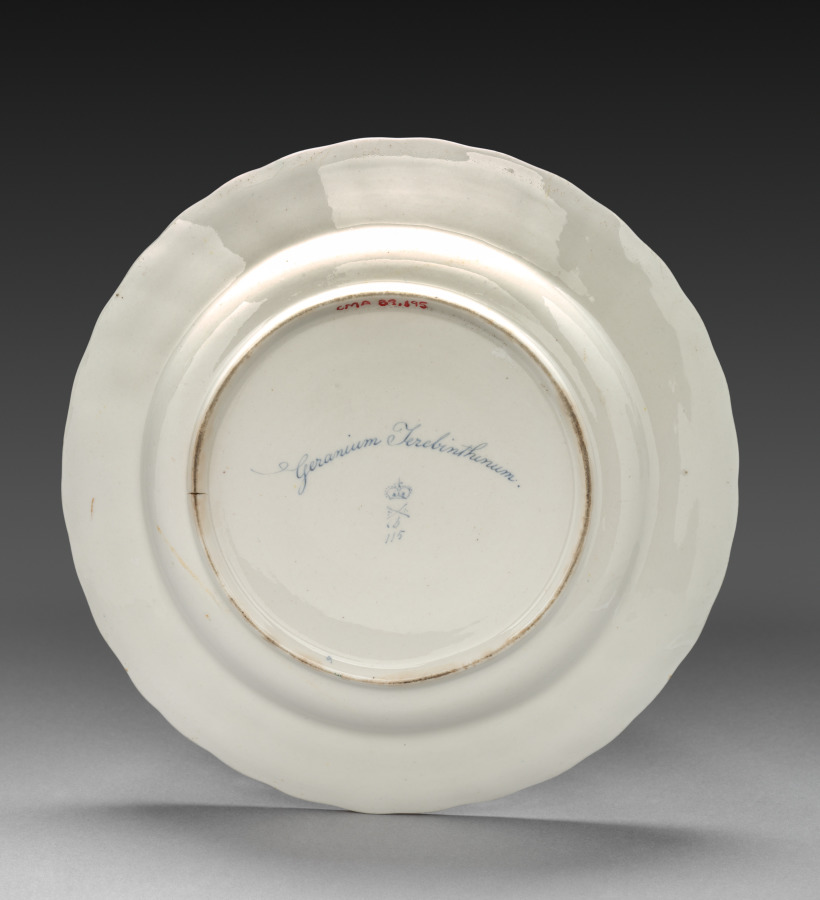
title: Plate from Dessert Service: Geranium Terabinthinum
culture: England, Derby, 18th century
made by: Derby (Crown Derby Period) (British)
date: c. 1800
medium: porcelain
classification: Ceramic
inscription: inscribed in blue on back: Geranium Terebinthinum./crown/crossed batons and dots/D/115. At edge: 9.